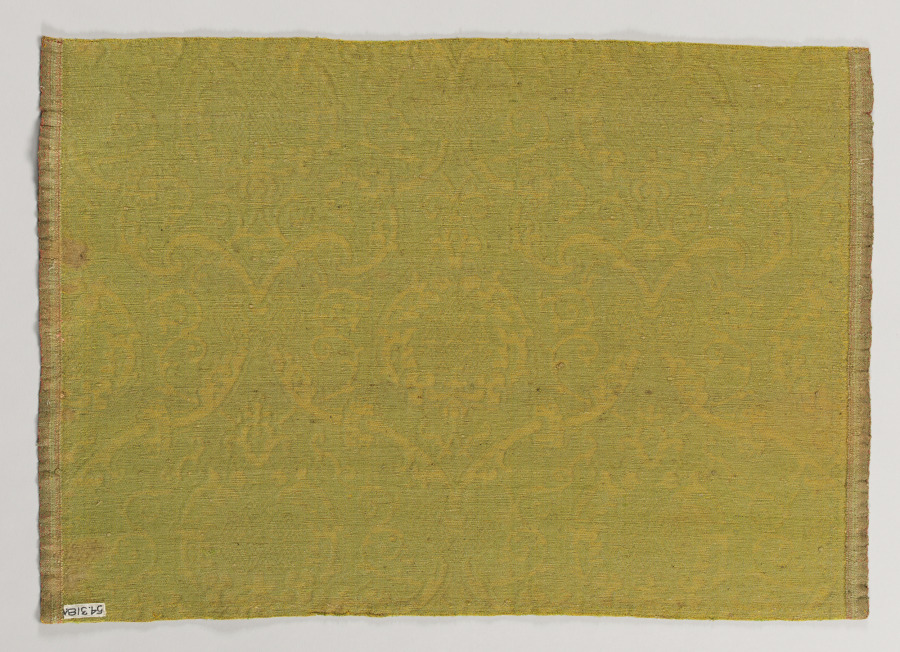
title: Length of Fabric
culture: Italy or Spain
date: 1500s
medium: brocade; silk and linen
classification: Textile